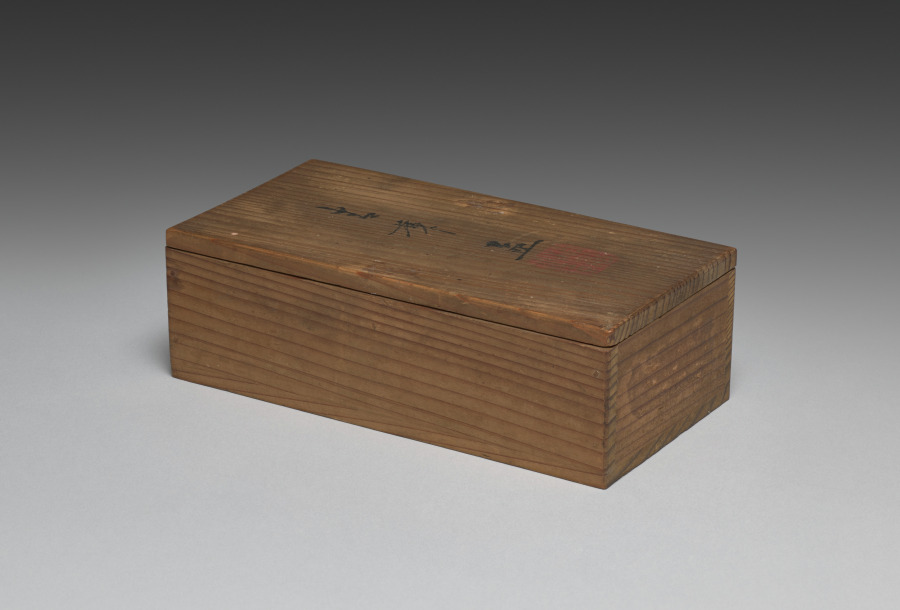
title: Sake Cups with Auspicious Flora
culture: Japan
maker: Seifū Yohei II (Japanese, 1844–1878)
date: 1861–78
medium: Pair of sake cups; porcelain with underglaze blue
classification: Ceramic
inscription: 松梅芝仙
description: Seifū Yohei II and his successor, Seifū Yohei III, trained in ink painting. Their brush skills are seen in their underglaze cobalt blue designs. One of Yohei II’s sake cups has depictions of orchid, bamboo, and chrysanthemum, representing spring, summer, and fall, while the other has pine and plum, representing winter. Just under the rim, he has also brushed the phrase “Pine, plum, and fungus immortals” (松梅芝仙).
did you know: These modest cups are important for the connoisseurship of the art of Yohei II because their original box is intact with a signature and seal on the interior of the lid.